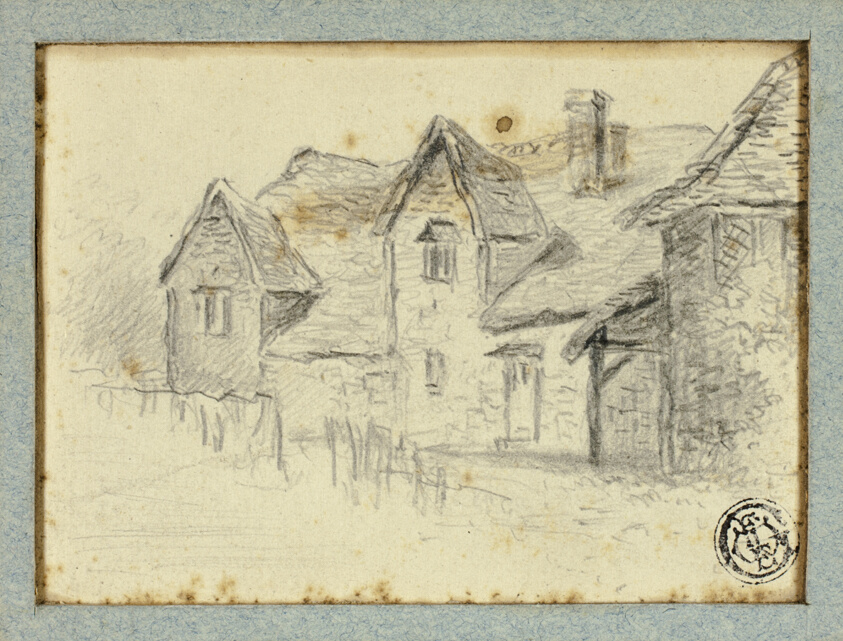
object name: Drawing and Watercolor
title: Houses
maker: Hendrik Pieter Koekkoek (Dutch, 1843-c. 1890)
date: c. 1877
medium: Graphite on cream wove paper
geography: Holland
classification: graphite; drawings (visual works); prints and drawing